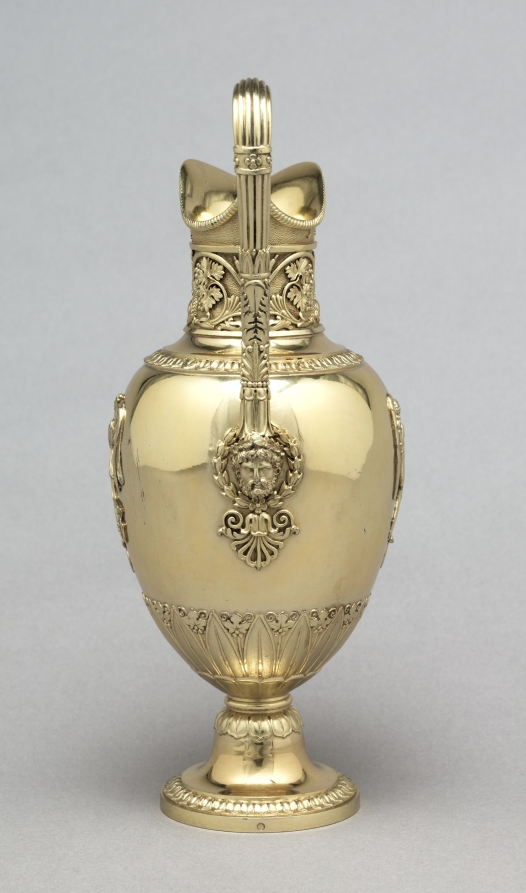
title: Ewer (aiguière)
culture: France, 19th century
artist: Jean Baptiste Claude Odiot (French)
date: c. 1817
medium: silver gilt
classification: Silver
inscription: [Excise mark for medium-sized work, Paris, 1809-1819, on edge of base]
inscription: [Two maker's marks of Jean-Baptiste-Claude Odiot after the Revolution, inside foot]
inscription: [Official assay mark for first standard silver, Paris, 1809-1819, near exterior upper rim]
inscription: [Applied coat of arms of the count Alfred de la Chapelle, Seigneur of Morton and Beaulieu, Périgord “accolé” with an alternate version of de la Chapelle, exterior of foot]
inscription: [Struck twice, interior foot]: "ODIOT"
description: Jean-Baptiste-Claude Odiot’s reputation stretched internationally. Commissioned by Russian count Nikolei Demidoff, this ewer was one part of an extensive silver dinner service. Decorated with motifs of classical antiquity, this object’s Greco-Roman silhouette, grape vine frieze, raised mythological figures, and sinuous swan’s neck handle were likely inspired by the designs of Charles Percier and Pierre-François Fontaine, architects of Napoleon I.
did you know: The coat of arms on the foot of this ewer belongs to the count Alfred de la Chapelle who owned this silver dinner service during the second half of the 19th century.